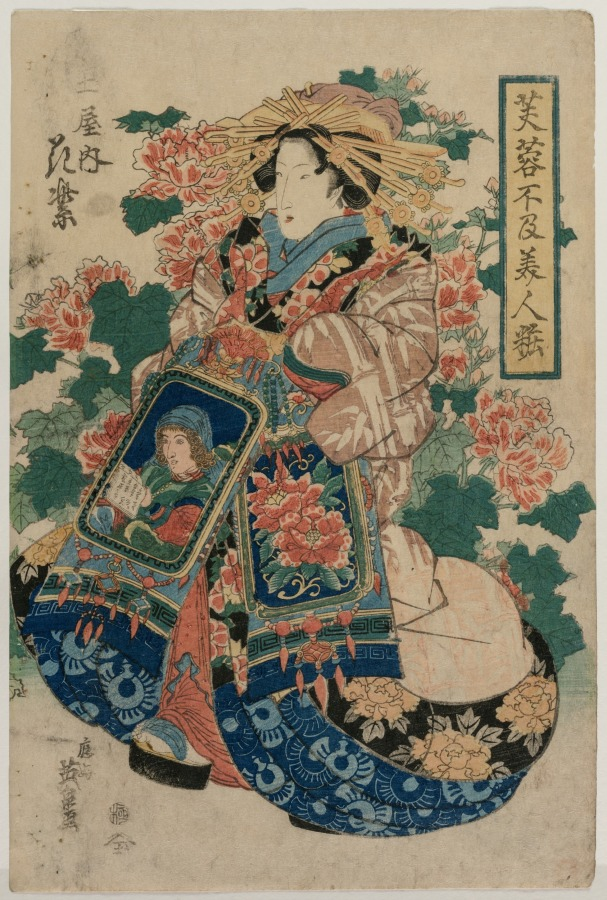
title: The Courtesan Hanamurasaki of the Tsuchiya (from the series Beauties in their Finery amid Mallow Flowers)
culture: Japan, Edo period (1615–1868)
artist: Keisai Eisen (Japanese, 1790–1848)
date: early or mid 1830s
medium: color woodblock print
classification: Print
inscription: Artist's signature: Okō (konomi ni ōjite) Eisen ga. Artist's seal: Moritaya Hanjirō (emblem).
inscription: Seal: kiwame.